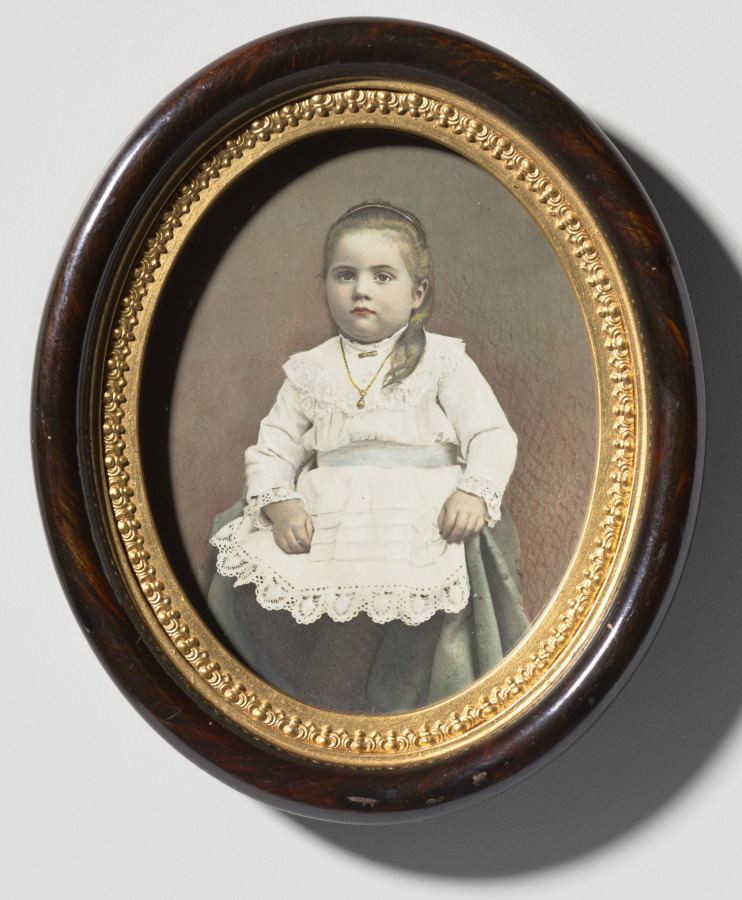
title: Clara L. White as a Child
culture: America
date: 1885–86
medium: Matte collodion with hand-applied crayon and paint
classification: Photograph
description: Virtuoso painting is possible on this very intimate scale, yielding an image that lies on the border between the worlds of photography and the painted miniature. Because the subject’s name and life dates were written on the back, we have found out that White (1883–1987), who never married, spent her life in the vicinity of Winchester, Connecticut, and worked at least into her late sixties as a stenographer and later, secretary to the principal of a school.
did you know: There is a black-and-white photograph underneath all the paint here.